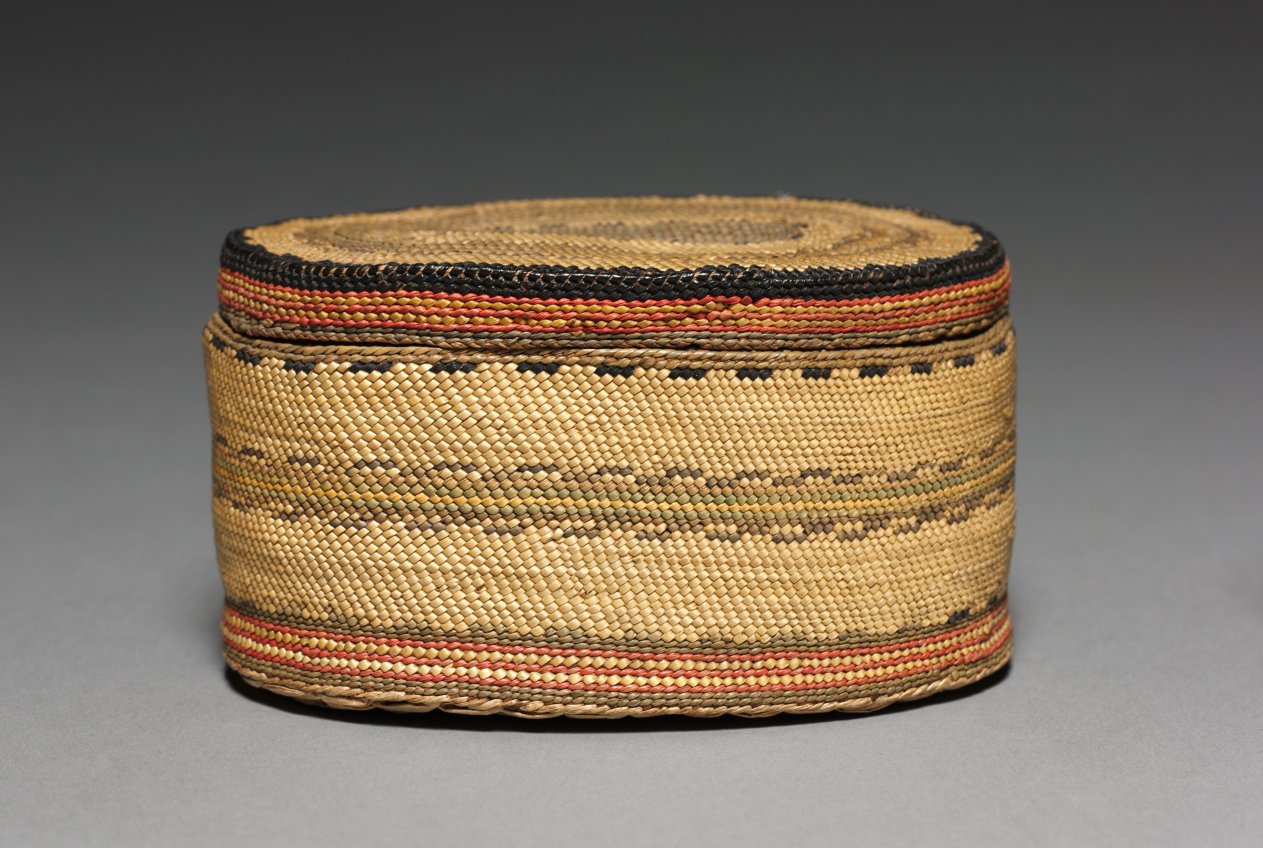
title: Lidded Bowl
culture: Northwest Coast, Vancouver Island, early 20th century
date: c 1900– 1925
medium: twined grass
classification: Basketry